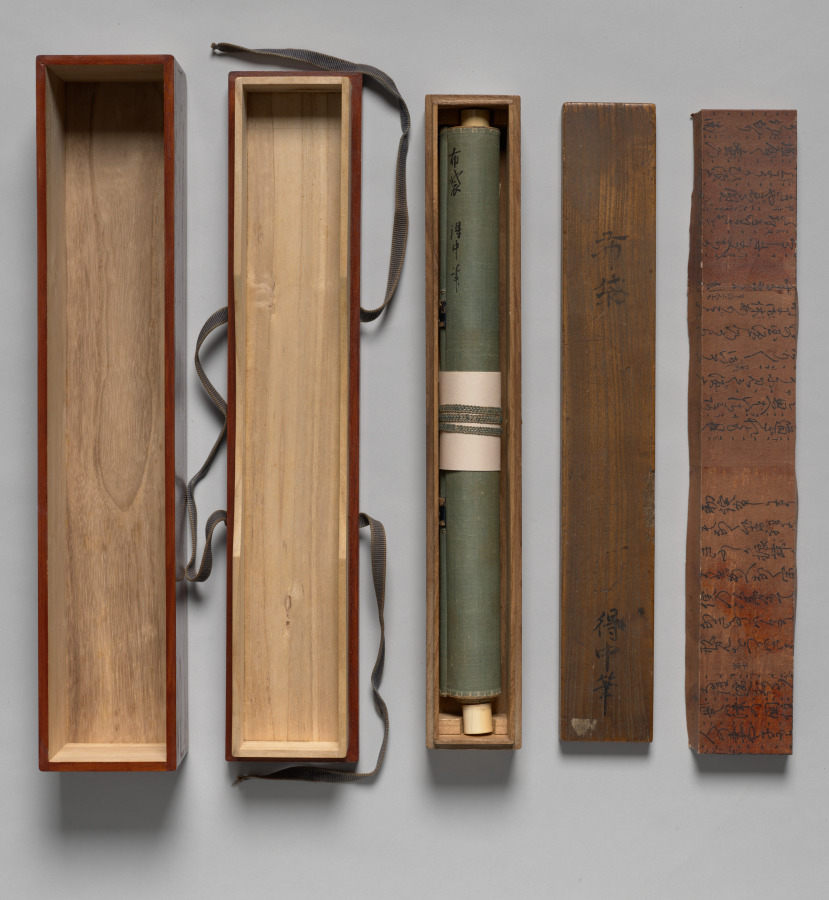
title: Hotei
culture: Japan, Muromachi period (1392–1573)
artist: Tokuchū (Japanese, late 1400s)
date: late 1400s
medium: hanging scroll; ink on paper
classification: Painting